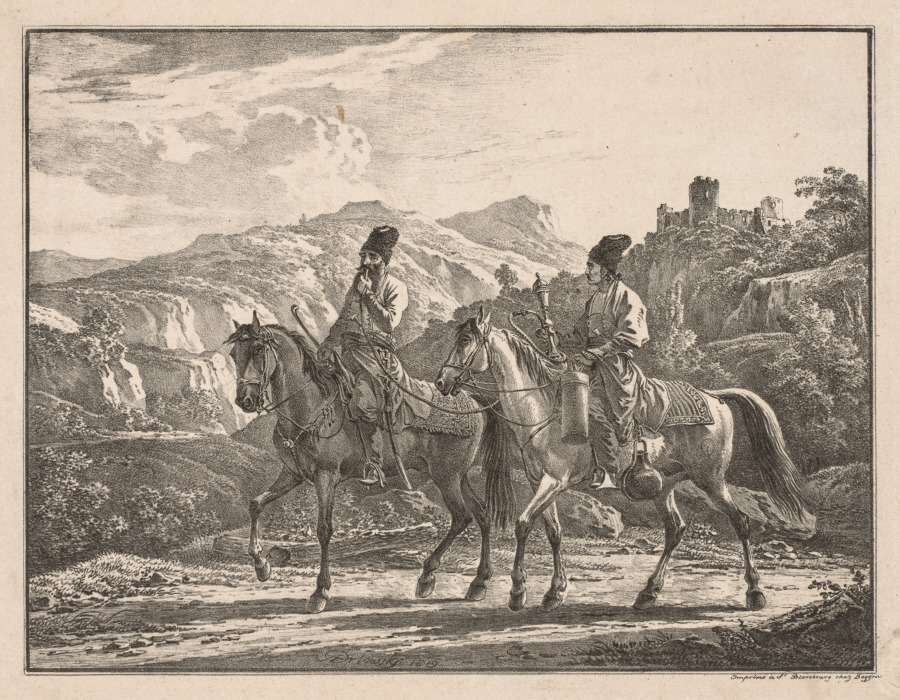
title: Two Cossacks on Horseback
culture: Russia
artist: Aleksandr Orlowski (Russian, 1777–1832)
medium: lithograph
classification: Print